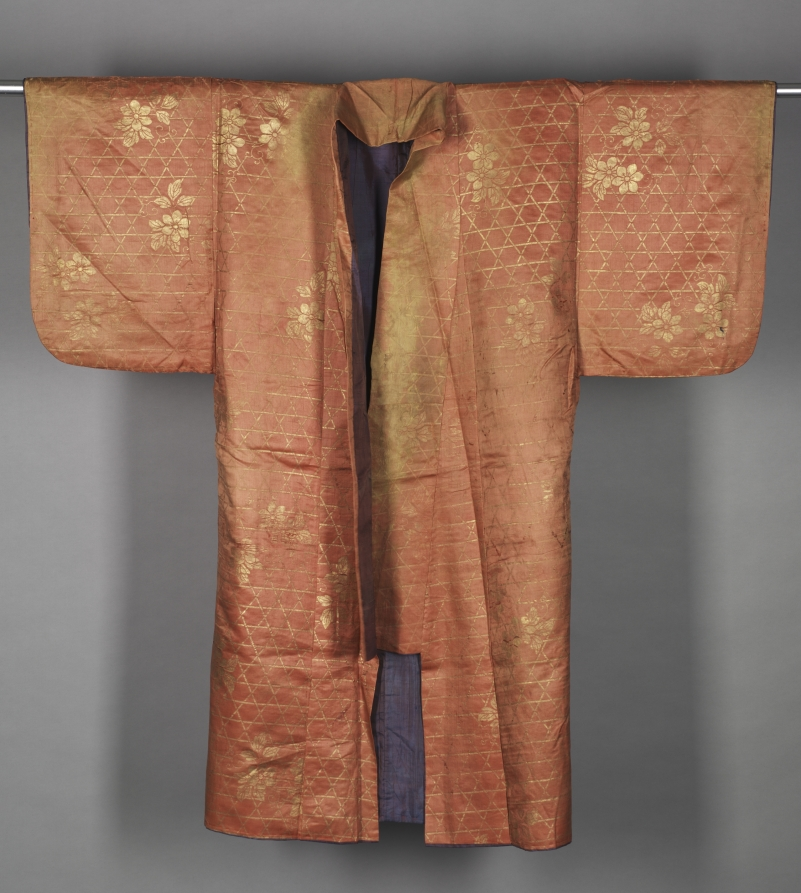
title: Noh Costume (Surihaku) with Flowers in Fence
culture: Japan, Edo period (1615–1868)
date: 1800–1850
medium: silk, metal thread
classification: Garment